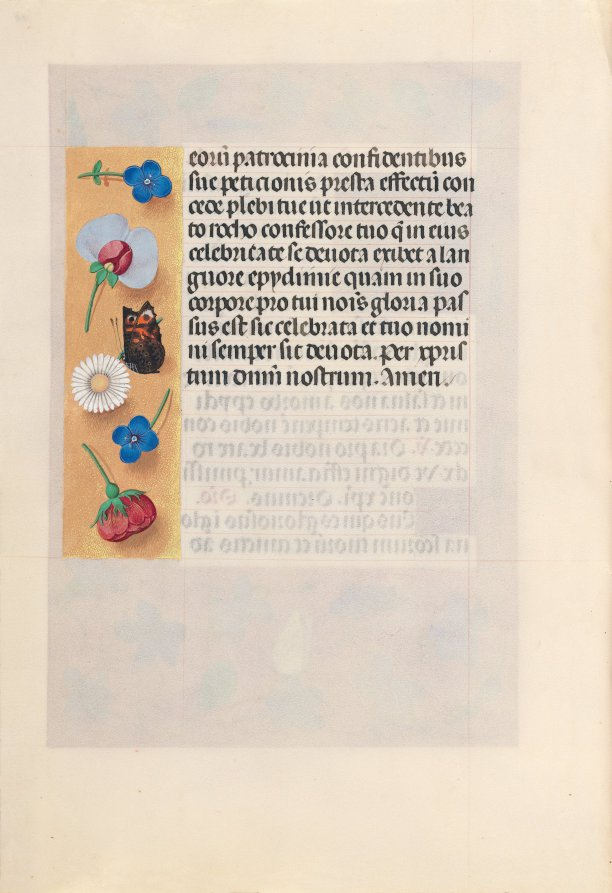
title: Hours of Queen Isabella the Catholic, Queen of Spain: Fol. 182v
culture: Flanders, Ghent and Bruges, late 15th century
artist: Master of the First Prayerbook of Maximillian (Flemish, c. 1444–1519)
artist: and Associates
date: c. 1500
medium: ink, tempera, and gold on vellum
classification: Bound Volume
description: This manuscript was illuminated by a circle of at least five highly organized manuscript painters active in the Flemish cities of Ghent and Bruges. The principal illuminator was Alexander Bening, who painted the majority of the book's miniatures. Manuscripts produced by this circle of artists are renowned for the decoration of their borders, which typically feature a rich variety of realistically-painted flowers, birds, and butterflies. This prayer book, called a book of hours, was intended not for a cleric, but for the private devotions of a lay person-in this case, Isabella the Catholic, Queen of Spain (1451-1504). Isabella's coat of arms embellishes the book's frontispiece. It is unlikely that the book was commissioned by the Queen herself; rather, she probably received it as a diplomatic gift from someone courting her patronage, perhaps Cardinal Francisco Jimenez de Cisneros. A Franciscan friar, Jimenez was dependent upon Isabella for his advancement, first to the post of Queen's confessor in 1492, and then to Archbishop of Toledo in 1495.